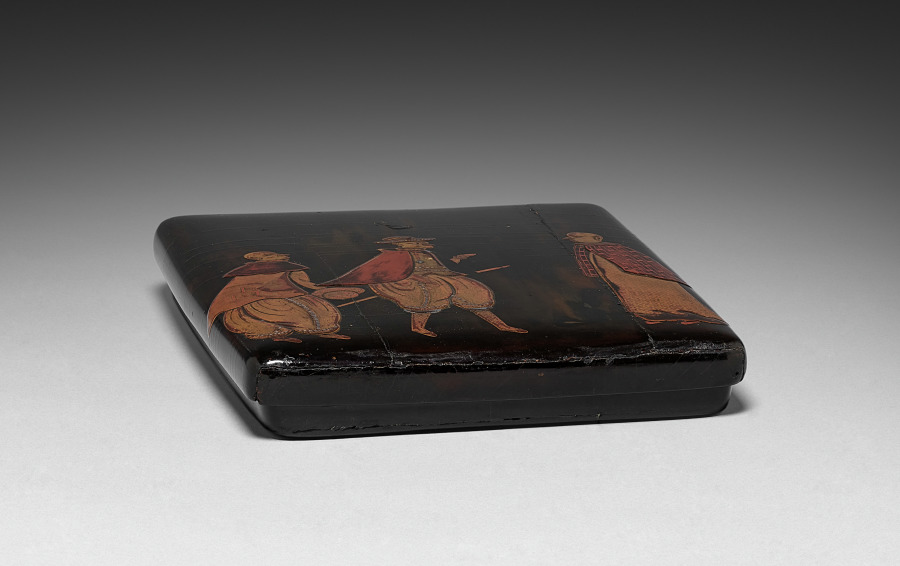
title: Writing Box (Suzuribako) with Europeans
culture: Japan, Edo period (1615–1868)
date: 1800s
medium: lacquered wood with gold maki-e, silver inlay and red lacquer on black ground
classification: Lacquer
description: The two people on the left of this box lid's design are Portuguese traders, identifiable by their balloon-shaped pants. Facing them is a Jesuit priest in a long robe. Portuguese ships arrived in Japan in the 1540s. Imagery first made to document the appearance of the foreigners survived as decoration on later objects like this one.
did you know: The Japanese term nanban 南蛮 is used to describe designs like the one on this box.